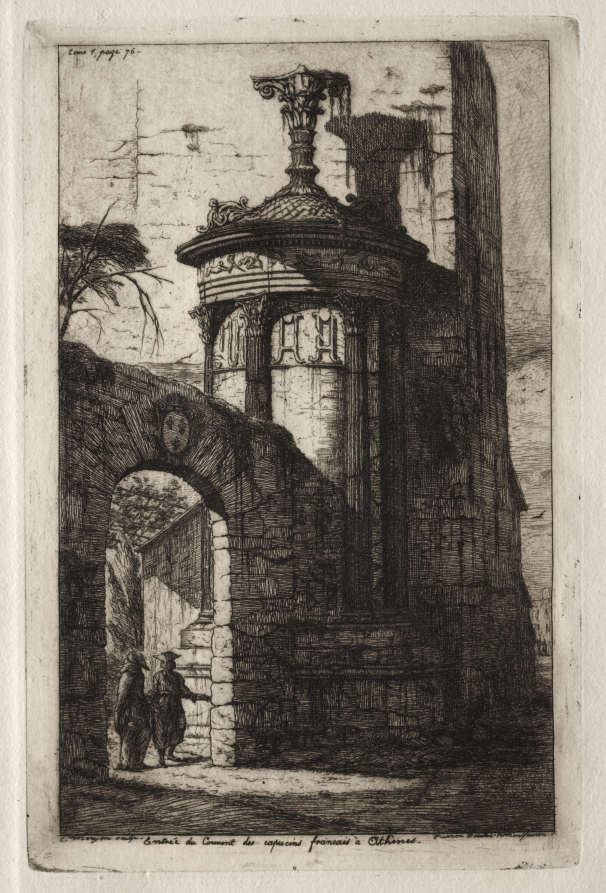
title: Entrance to the French Capuchin Convent at Athens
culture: France, 19th century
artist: Charles Meryon (French, 1821–1868)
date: 1854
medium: etching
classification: Print